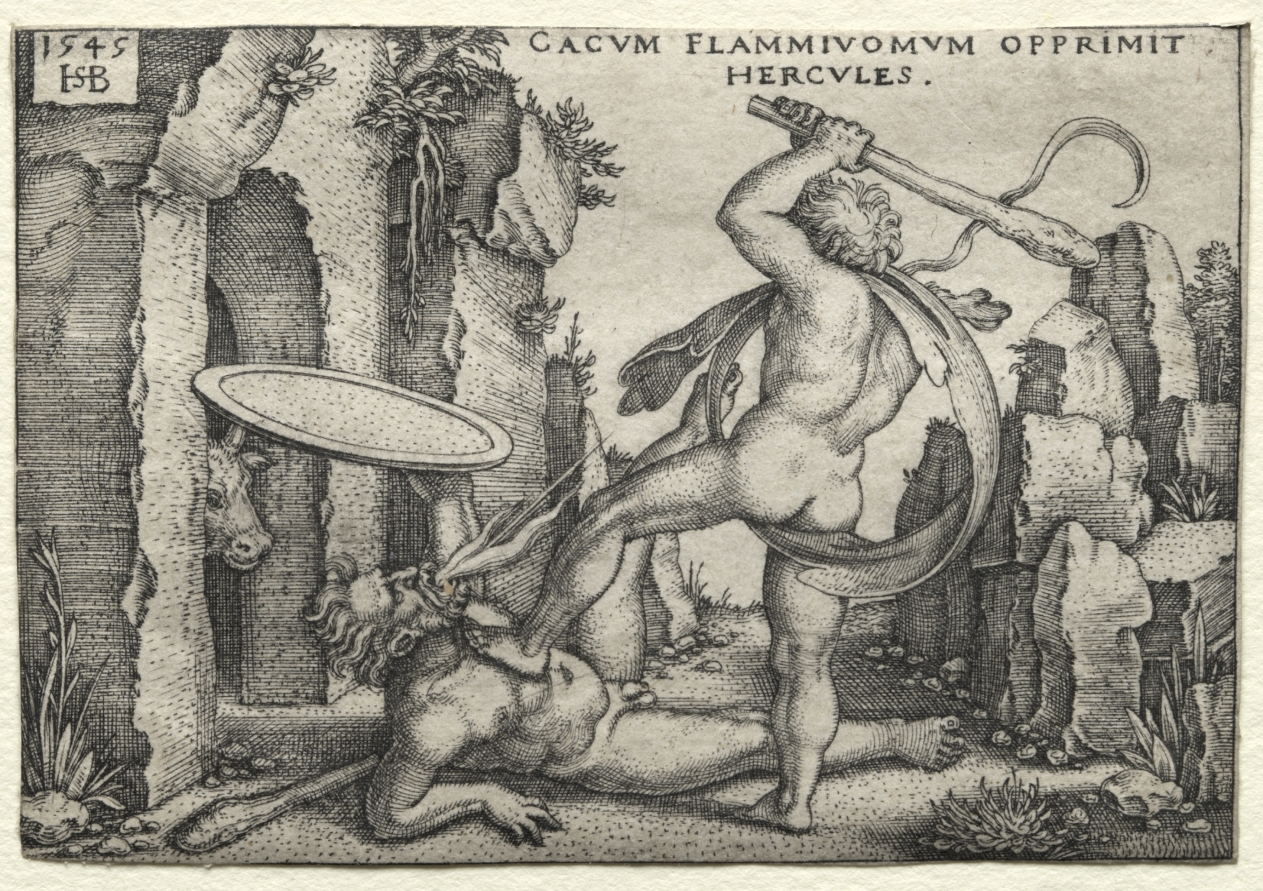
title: The Labors of Hercules: Hercules Killing the Giant Cacus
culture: Germany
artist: Hans Sebald Beham (German, 1500–1550)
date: 1545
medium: engraving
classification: Print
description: Beham was one of several German printmakers referred to today as the “Little Masters.” They established their artistic prowess by engraving remarkably small prints, appealing to collectors fascinated with miniature objects and curiosities. Here, Beham has packed 12 larger-than-life stories of the mighty Hercules into tiny prints. The series includes three of the 12 labors Hercules performed as penance for slaying his children in a fit of madness: Strangling the Nemean Lion, Killing the Lernean Hydra, and Dragging Cerberus from the Underworld. The other scenes depict tales from his life and the events preceding his death. The son of Jupiter and the mortal Alcmena, Hercules was both man and god. His saga of moral and physical trials made him one of the most popular classical heroes in Renaissance art.